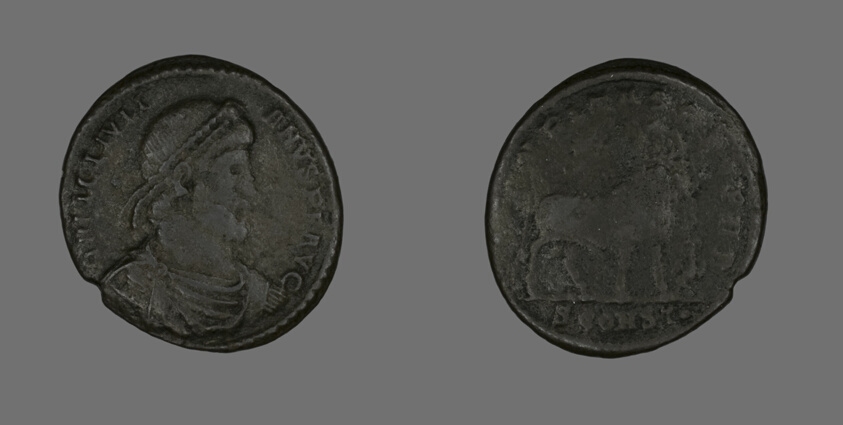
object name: Coin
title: Base (Coin) Portraying Emperor Julianus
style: roman (ancient, style or period), ancient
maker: Roman, minted in Aries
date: 360-363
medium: Bronze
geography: Roman Empire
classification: coin; ancient art